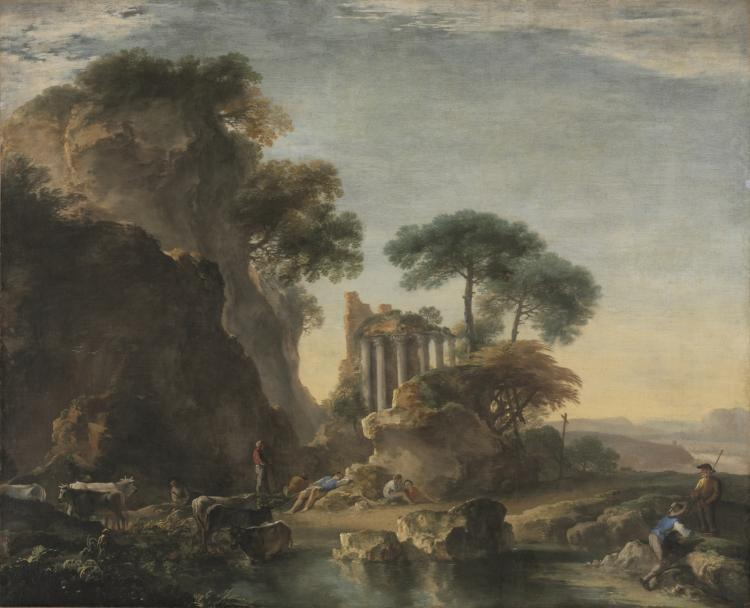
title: Ruins in a Rocky Landscape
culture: Italy, 17th century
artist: Salvator Rosa (Italian, 1615–1673)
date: c. 1640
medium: oil on canvas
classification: Painting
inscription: Signed lower right: "SR [monogram]"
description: In 1635, Rosa left his native Naples for Rome, the undisputed art center of the 17th century, where a new type of landscape painting was emerging, distinguished by the effects of light and atmosphere. Rosa’s fame grew quickly as a painter of landscapes that conjured the beauty and fertility of the Bay of Naples. Ruins in a Rocky Landscape incorporates classical ruins, iridescent reflections of light, and a pastoral tone evoked by the idling shepherds, exemplifying the work that earned Rosa his early fame. The dark, dramatic rocks that rise along the left foreshadow the wildness that Rosa would cultivate in his later sublime landscapes.